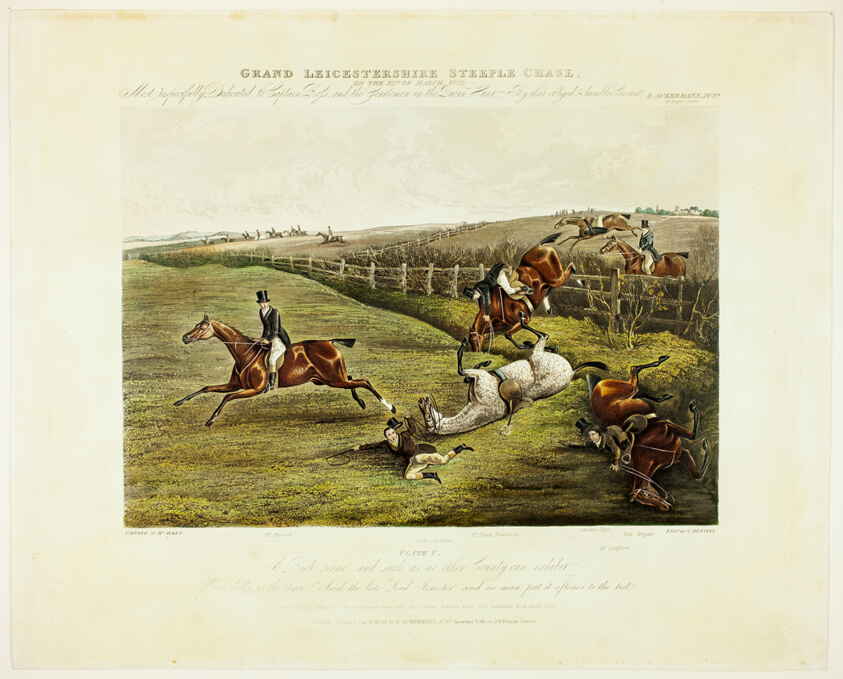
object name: Print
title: A Rich Scene, from Grand Leicestershire Steeplechase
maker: Charles Bentley (English, 1806-1854); after Henry Alken (English, 1785-1851); published by R.A. Ackermann (English, 1764-1834)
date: published 1830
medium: Color aquatint on paper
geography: England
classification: aquatint; print; prints and drawing